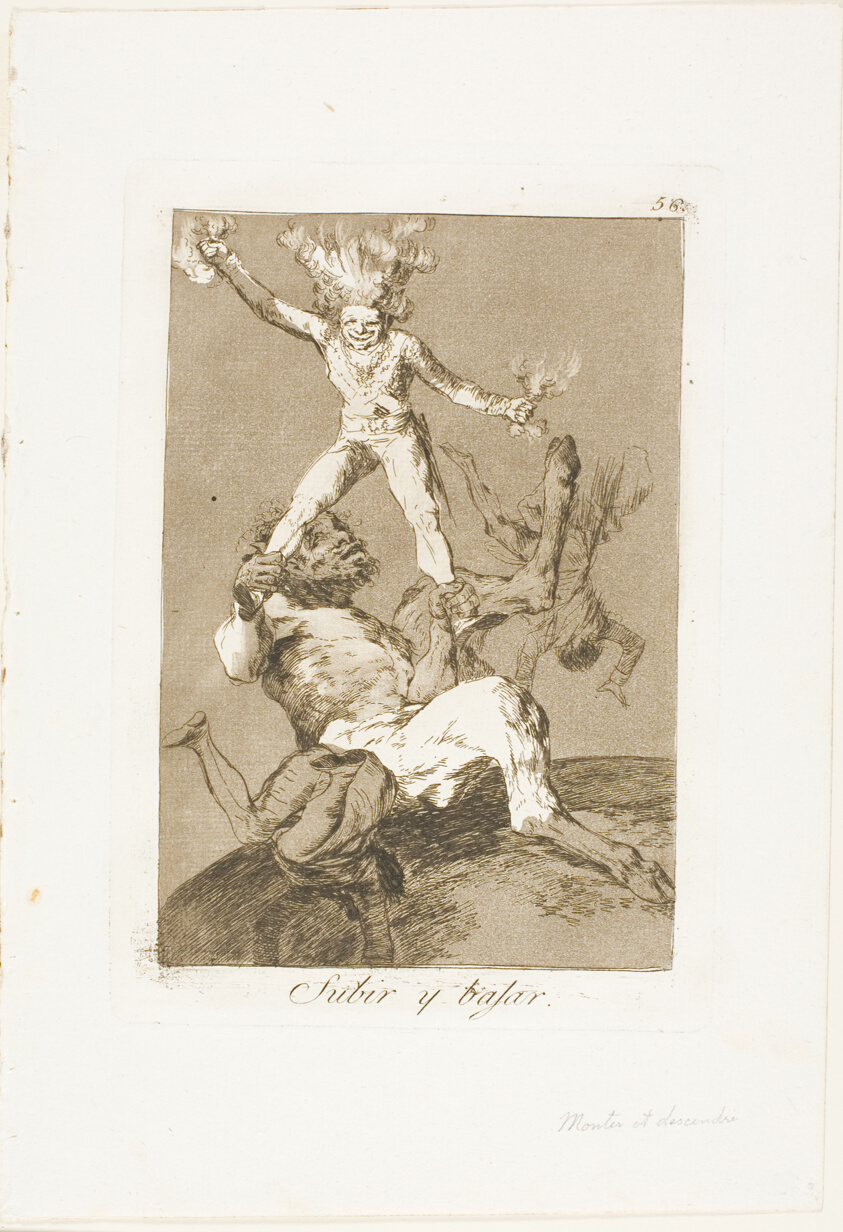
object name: Print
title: To Rise and to Fall, plate 56 from Los Caprichos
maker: Francisco José de Goya y Lucientes (Spanish, 1746-1828)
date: 1797/99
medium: Etching and aquatint on ivory laid paper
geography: Spain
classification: etching; print; prints and drawing